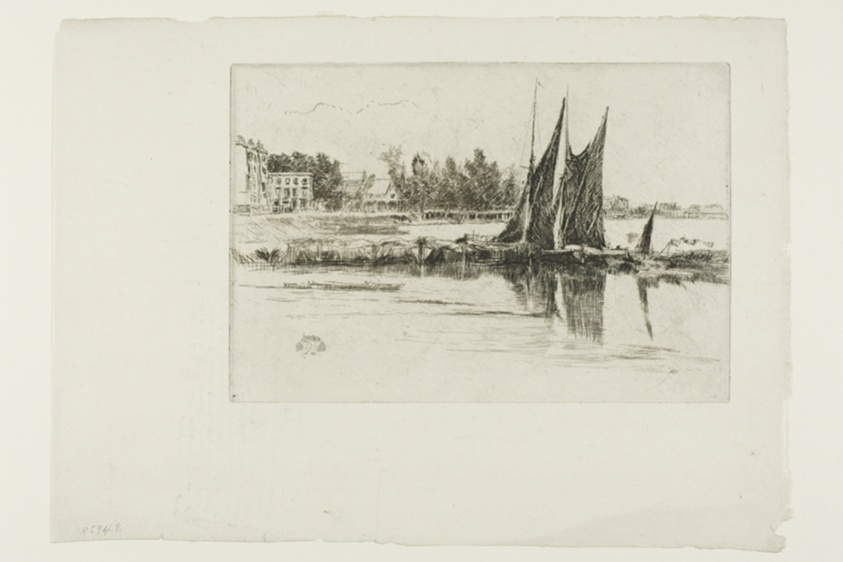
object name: Print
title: Hurlingham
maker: James McNeill Whistler (American, 1834-1903)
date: 1879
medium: Etching and drypoint with foul biting in black ink on off-white laid paper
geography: United States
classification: etching; foul biting; drypoint; print; prints and drawing; paper